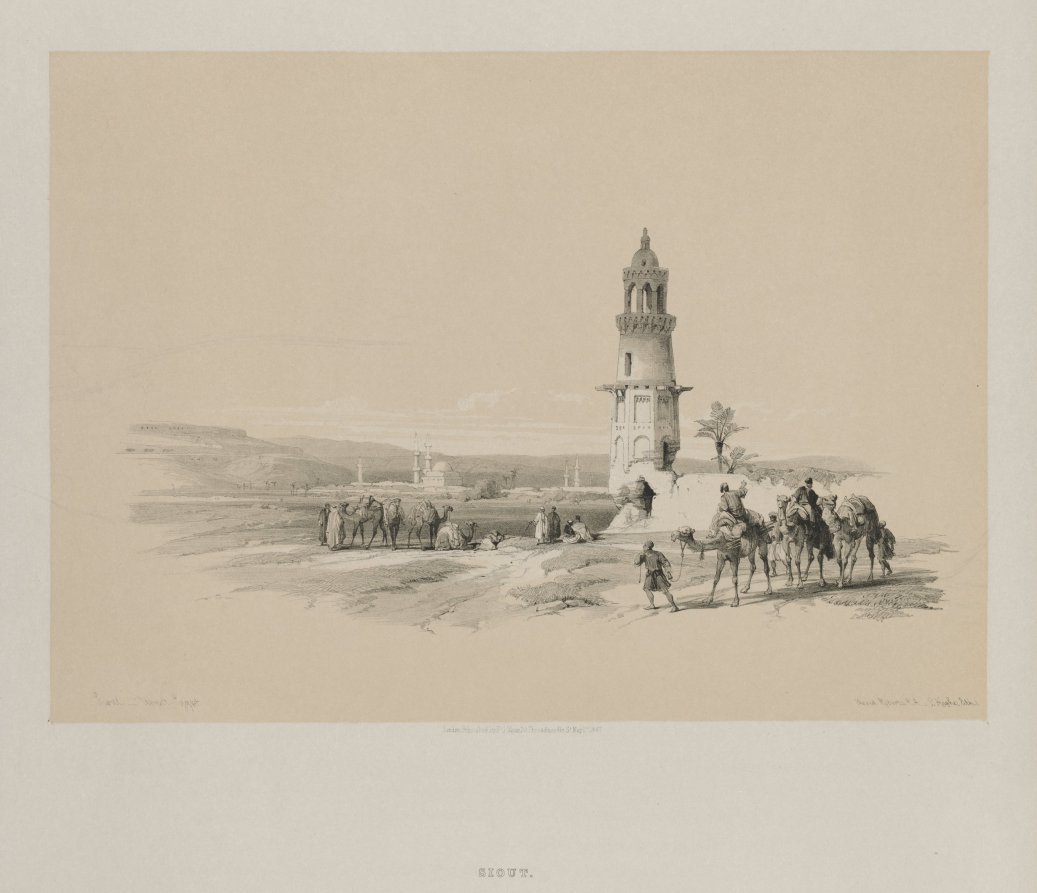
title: Egypt and Nubia, Volume I: Siout - Upper Egypt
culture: England, 19th century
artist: Louis Haghe (British, 1806–1885)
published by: F. G. Moon, 20 Threadneedle Street, London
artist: after David Roberts (Scottish, 1796–1864)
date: 1847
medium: color lithograph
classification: Print